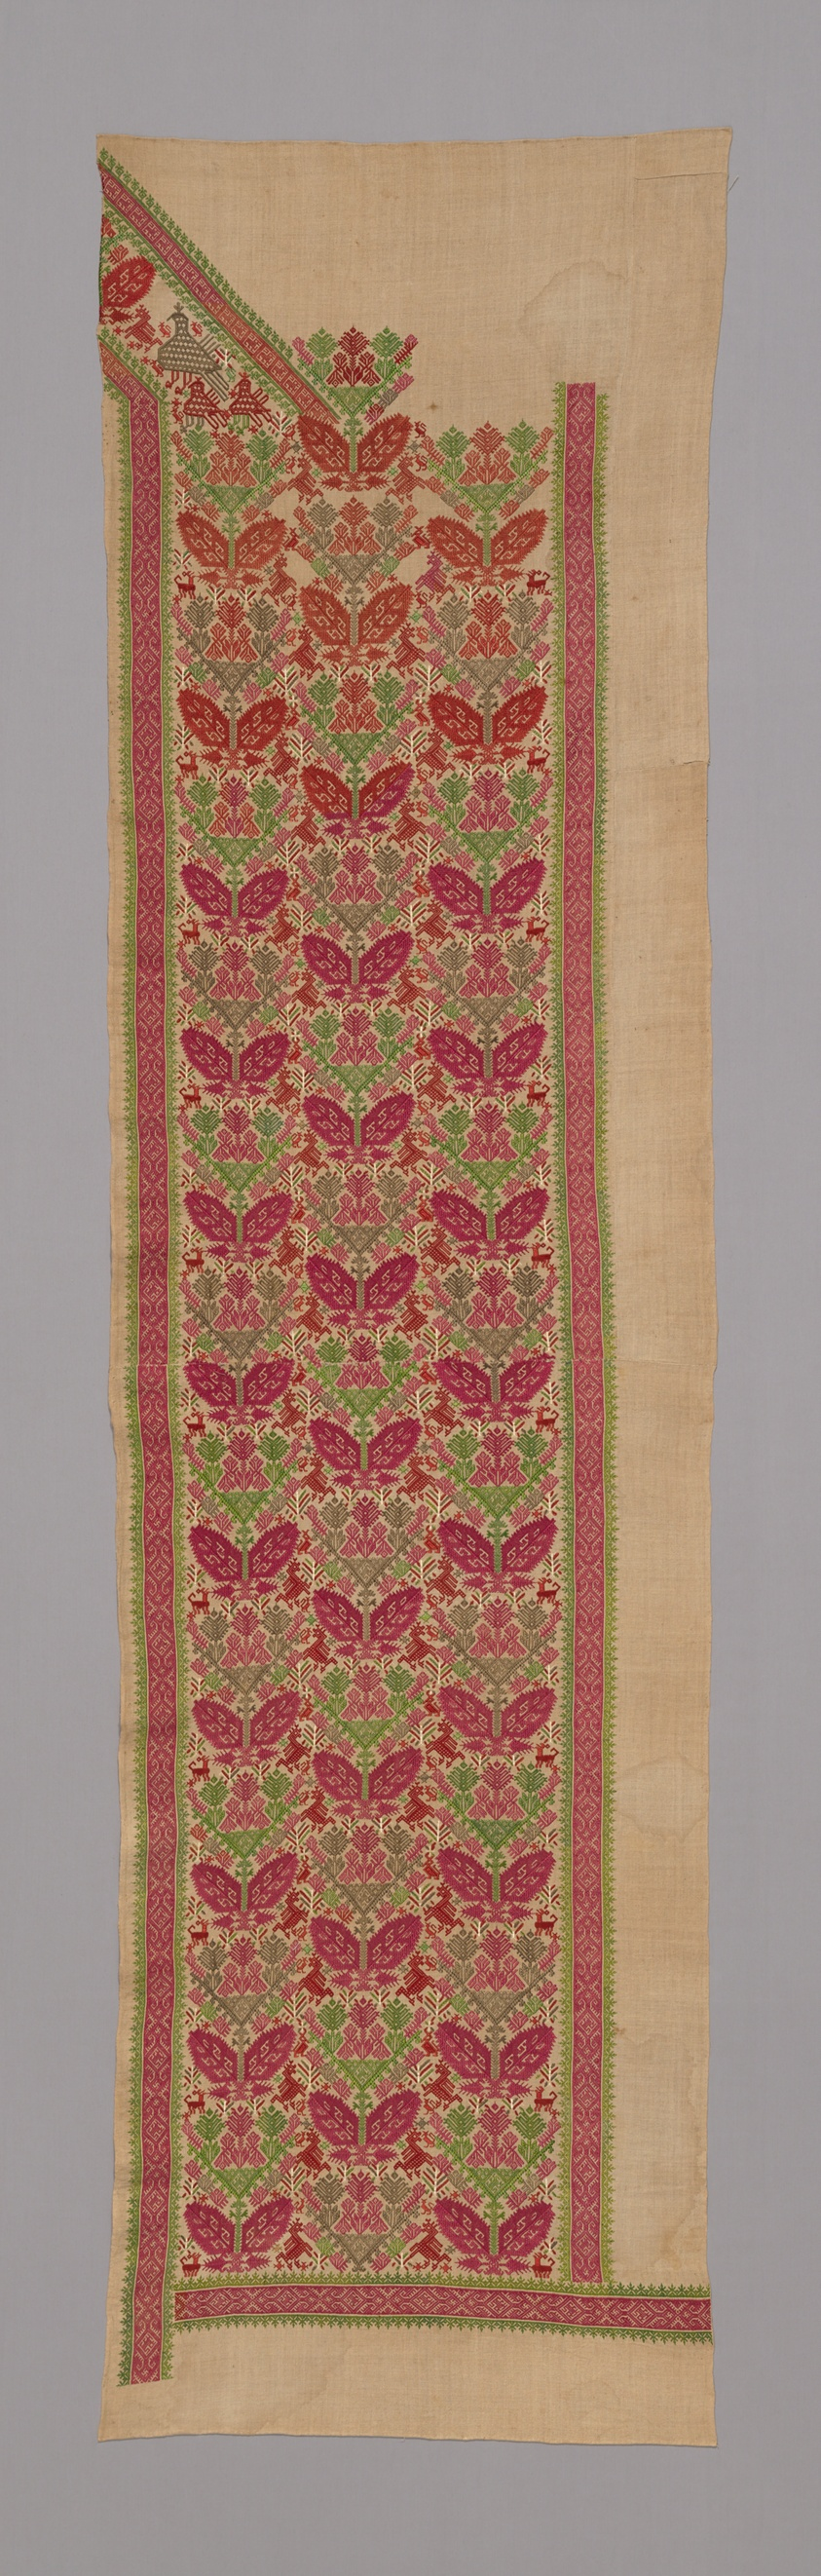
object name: Textile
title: Panels (For a Bed Curtain)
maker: Greece, Dodecanese Islands, Patmos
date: 17th/18th century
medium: Linen, plain weave; embroidered with silk in chain, double running, running (pattern darning), satin, and stem stitches; two loom widths joined on panel "a"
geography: Greece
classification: textile; needlework (visual works)